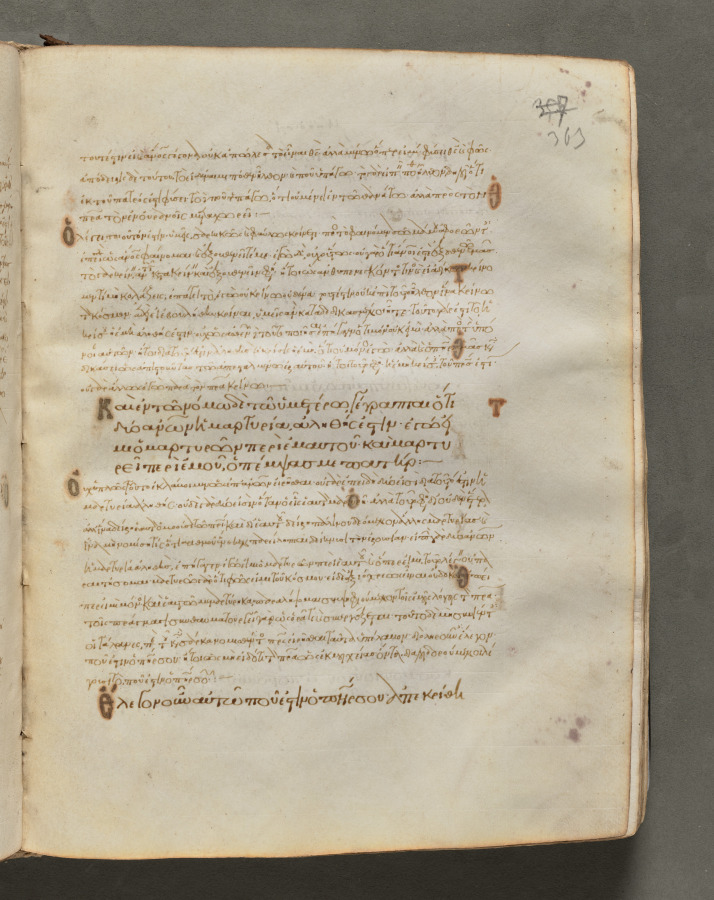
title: Text, folio 363 (recto), from a Gospel Book with Commentaries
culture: Byzantium, Constantinople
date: c. 1000–1100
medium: ink, tempera, and gold on vellum; leather binding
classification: Bound Volume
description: Each of the four gospels in this book opens on a page with brilliantly illuminated borders depicting the author of the text as well as birds—principally peacocks, symbols of the immortality of the soul—and fountains, representing the fountain of life and the salvation of the soul. This volume consists of 428 leaves with texts in Greek. Its level of sophistication suggests that it was probably written and decorated in a monastery in Constantinople.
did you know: Gospel books were carried in procession through Byzantine churches.